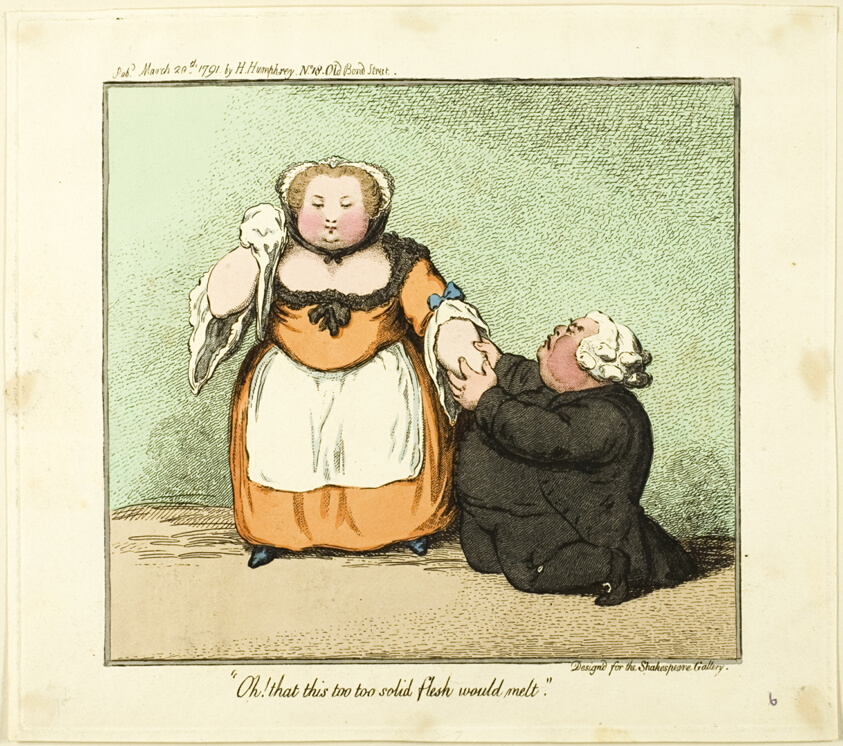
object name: Print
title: "Oh! that this too too solid flesh would melt."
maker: James Gillray (English, 1756-1815); published by Hannah Humphrey (English, c. 1745-1818)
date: published March 20, 1791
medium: Etching in dark brown, with stipling and handcoloring, on cream wove paper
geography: England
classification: etching; print; prints and drawing